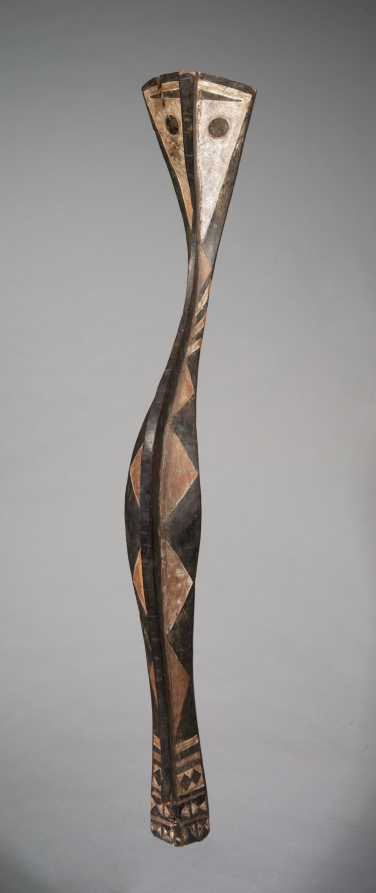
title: Serpent Headdress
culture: Africa, West Africa, Guinea, possibly Baga-style maker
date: late 1800s–early 1900s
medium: Wood (Nauclea pobeguinii) and paint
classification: Mask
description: Traditionally, Baga society was ruled by village councils of elders who derived their power from their direct contact with spirit entities through lifelong initiation rituals and the accumulation of secret knowledge. Two different religious orders controlled initiations, providing the context for much Baga art. One was identified as female, the other as male, though only men belonged to both groups. Initiations in each order followed three stages, culminating in the revelation of the highest spirit being. This type of Baga headdress embodied the serpent spirit Ninkinanka, honored for giving rain, bestowing riches, and bringing forth children. The serpent figure would be placed on top of a conical framework of palm branches carried on a male dancer’s head. It appeared at the end of the first level of the initiation for boys and girls or just before the circumcision at the beginning of the boys’ initiation.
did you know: In the context of boys' initiations, the serpent headdress was sometimes identified as the rainbow, which the Baga and their neighbors associate with beginnings and endings, life and death, and the continuation of lineages.